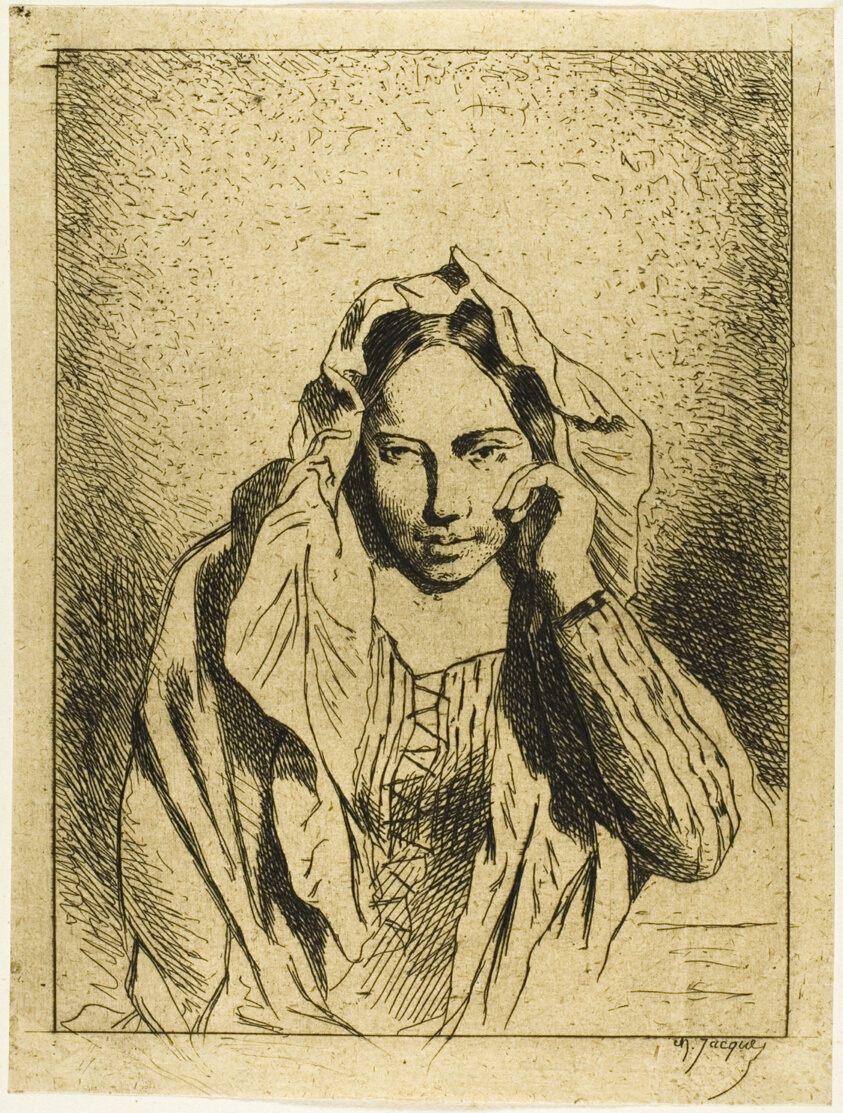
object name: Print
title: Portrait of a Seated Woman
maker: Charles Émile Jacque (French, 1813-1894)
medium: Etching on buff chine, laid down on ivory wove paper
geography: France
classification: etching; print; prints and drawing